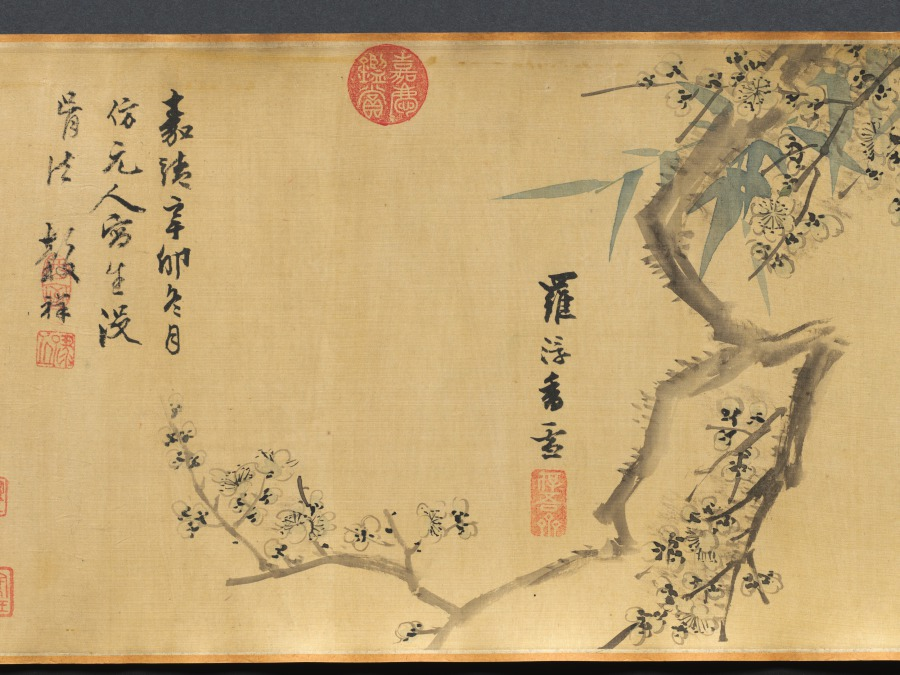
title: Flowers of Four Seasons, with Poems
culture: China, Ming dynasty (1368–1644)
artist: Wang Guxiang (Chinese, 1501–1568)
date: 1531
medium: handscroll; ink and light color on silk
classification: Painting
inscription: Artist's inscription, signature, and 15 seals. Ink Orchids. Sewn as pendants for the man of worth, swaying quiety, fragrance in the valley. [seal] Hsiao-chu ts'un Peony. Wiping his face, the young gentleman Ho [Ho Yen of Wei, Three Kingdoms] appears to have been powdered. His previous life was the perfume-stealing Han Shou [of Chin, 265–419 CE], the fragrance still lingers. [seal] Ts'un-wu chai. Flowering Crab Apple, New Bamboo. Shao-lin [Du Fu, 712–770] had to put down his brush. [Flowering Crab Apple]. Yü-k'o [Wen T'ung, d. 1079) in vain wrote poems about [Bamboo]. [seal] Yu-shih. Lotus Flowers. When she turns her head, half-hidden by a fan, and casts a glance, all the beautiful women become colorless. [seal] K'ang yüeh huai. Loquat. Ripeness in summer. [seal] Lu-chih. Pomegranate Flower. Whenever I remember you I will send my thoughts, but where have you gone--the [skirt] of pomegranate red? [seal] Wu-ho Sheng. Day Lily. Plant the day lily to forget sorrow. [seal] Yu-shih. Chrysanthemum. The untrammelled joy at the eastern fence. [seal] Lu-chih. Begonia. Comparing it to the beauties of Spring, and spreading them out as trimming for the stone steps. [seal] Yu-shih. Hibiscus. In recent years I have always enjoyed looking at flowers; instead of dark red I preferred pink ones. [seal] Jen-sheng i-lou. Narcissus, Camellia. The jade girdle left behind at Lo River. [Narcissus]. The precious pearls glitter before Spring. [Camellia]. [seal] Lu-chih. Heavenly Bamboo (Nandina domestica). A single branch in the wintry season. [seal] K'ang yüeh huai. Plum. Fragrant snow in the Lo-fou Mountains. [seal] Ts'un-wu chai. In the eleventh lunar month of the hsin-mao year of the Jiaqing era [1531], [I] imitated the boneless style of Yüan masters in sketching from life. Guxiang [seals] Yu-shih; Lu-chih. Translated by Wai-kam Ho/Lingyun Shih Liu (1980)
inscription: 2 colophons and 23 additional seals: 1 colophon dated 1632, and 2 seals of Li Jih-hua [Li Rihua] 李日華 (1565–1635); 1 colophon and 2 seals of Xiang Shengmo 項聖謨 (1597–1658); 3 seals of Liang Qingbiao 梁清標 (1620–1691); 6 seals of the Jiaqing 嘉慶 emperor (r. 1796–1820); 9 seals of Ch'eng Ch'i [Cheng Qi] 程琦 (1911–1988)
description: In this painting, flowers are loosely arranged by the seasons: narcissus and peony represent early spring; yellow loquat and lotus, summer; chrysanthemum, autumn; and the plum and evergreen bamboo, winter. The artist added to each flower a poetic line of calligraphy associating each plant with a historic or legendary figure. For example, the chrysanthemum, along with the line “The untrammeled joy at the eastern fence,” refers to the poet Tao Yuanming (died AD 427) who enjoyed chrysanthemums at the eastern fence in his garden. The scroll illustrates Wang Guxiang’s mastery of free brushwork, combining light monochrome ink with transparent colors. In his inscription, Wang says he used the “boneless” style without outlines as developed during the Yuan dynasty (1279–1368). Wang was a native of Changzhou, a city in southeast China known for its rich flora and fauna, and flower-and-bird painting tradition.